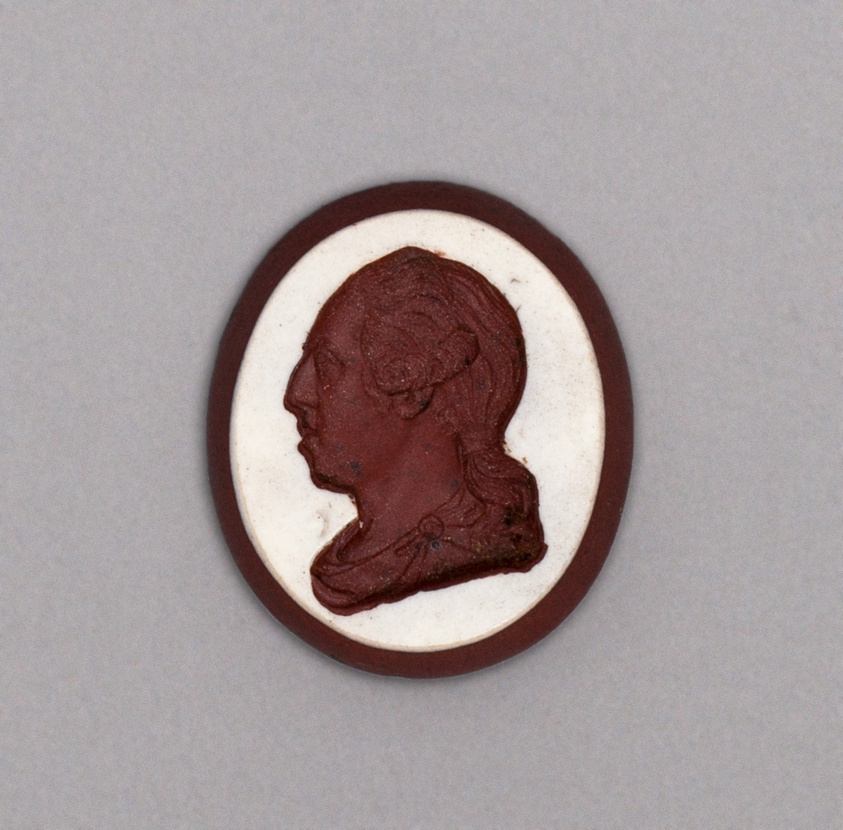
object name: Ceramics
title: Cameo with Portrait of Duke of Gloucester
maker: Wedgwood Manufactory (England, founded 1759)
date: Late 18th century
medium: Stoneware (rosso antico)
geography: Burslem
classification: cameo (sculpture); sculpture; stoneware; european decorative arts; ceramics